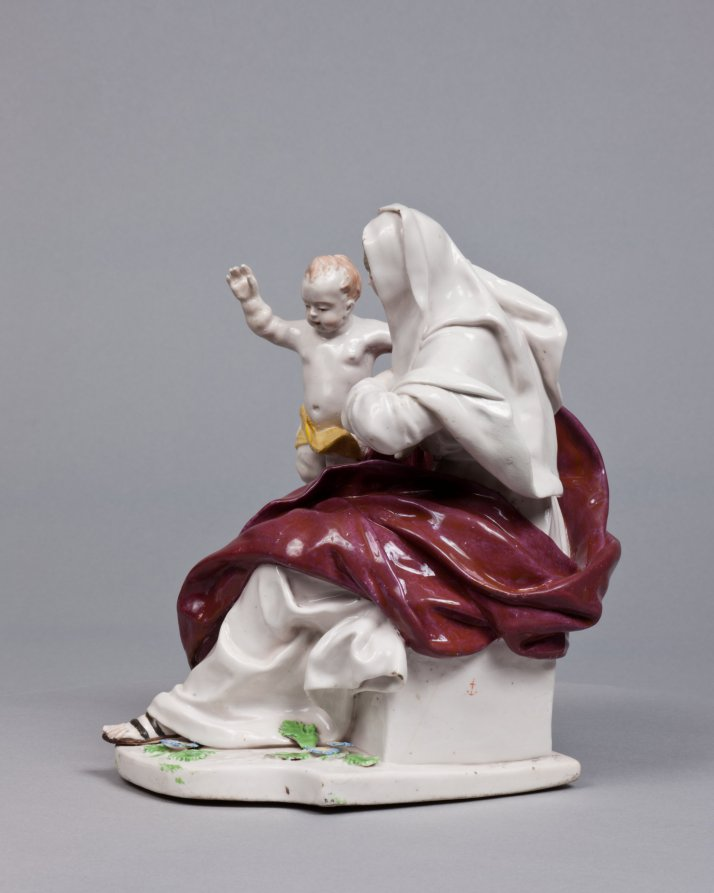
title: Madonna and Child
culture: England, Chelsea, 18th century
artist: Chelsea Porcelain Factory (Britain, London, 1745–84)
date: c. 1755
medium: porcelain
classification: Ceramic